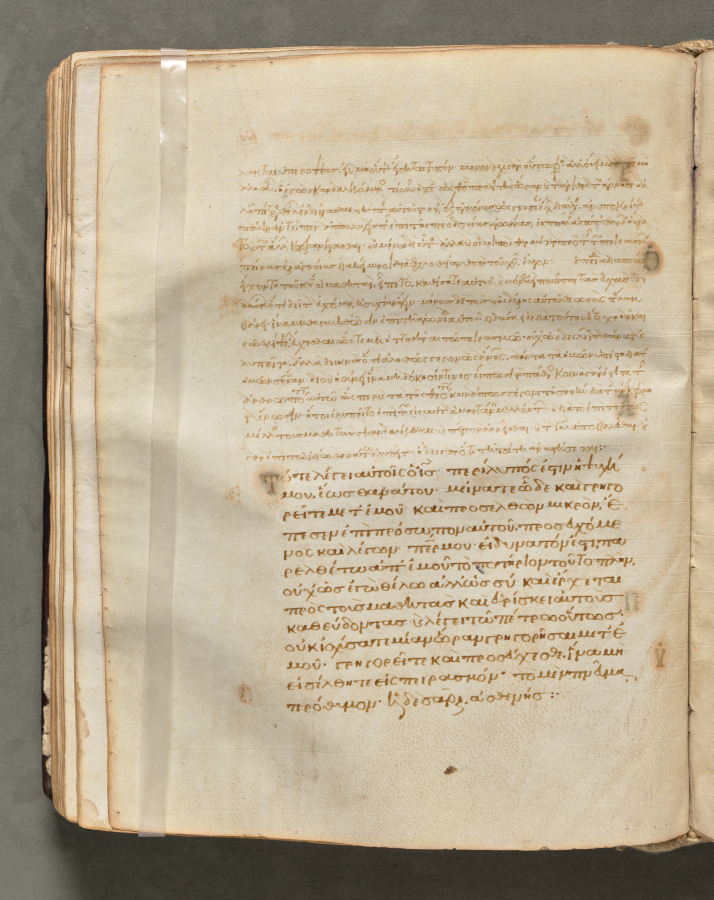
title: Text, folio 118 (verso), from a Gospel Book with Commentaries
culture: Byzantium, Constantinople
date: c. 1000–1100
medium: ink, tempera, and gold on vellum; leather binding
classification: Bound Volume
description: Each of the four gospels in this book opens on a page with brilliantly illuminated borders depicting the author of the text as well as birds-principally peacocks, symbols of the immortality of the soul-and fountains, representing the fountain of life and the salvation of the soul. This volume consists of 428 leaves with texts in Greek. Its level of sophistication suggests that it was probably written and decorated in a monastery in Constantinople.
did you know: Gospel Books were carried in procession through Byzantine churches.